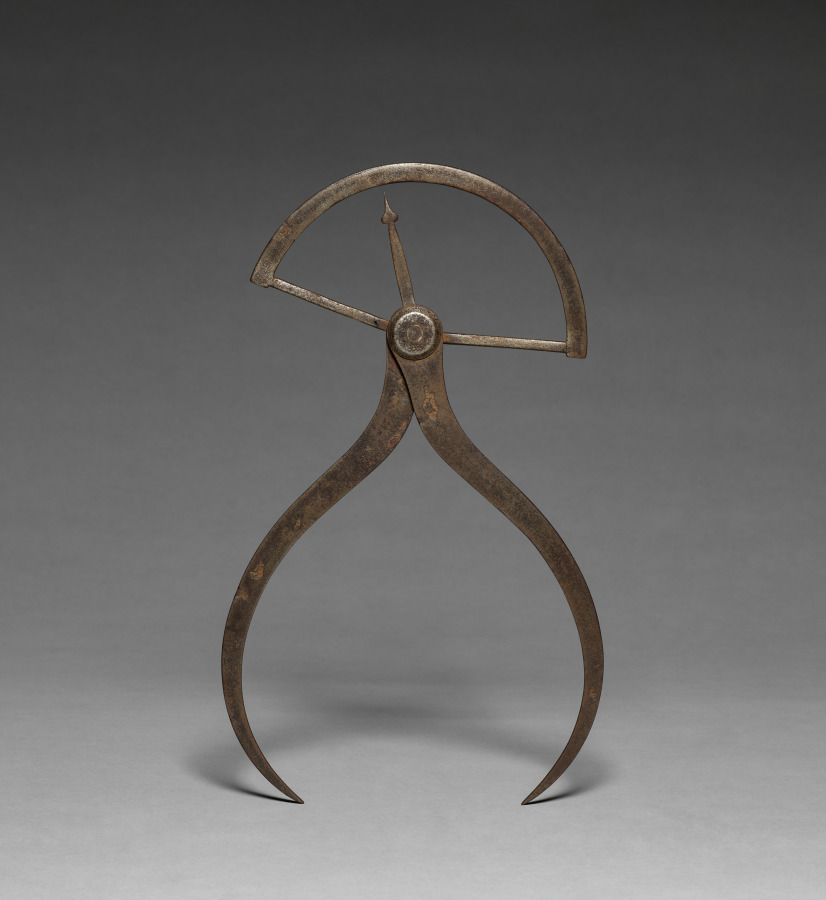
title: Calipers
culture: Europe, 17th century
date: 1600s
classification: Tool